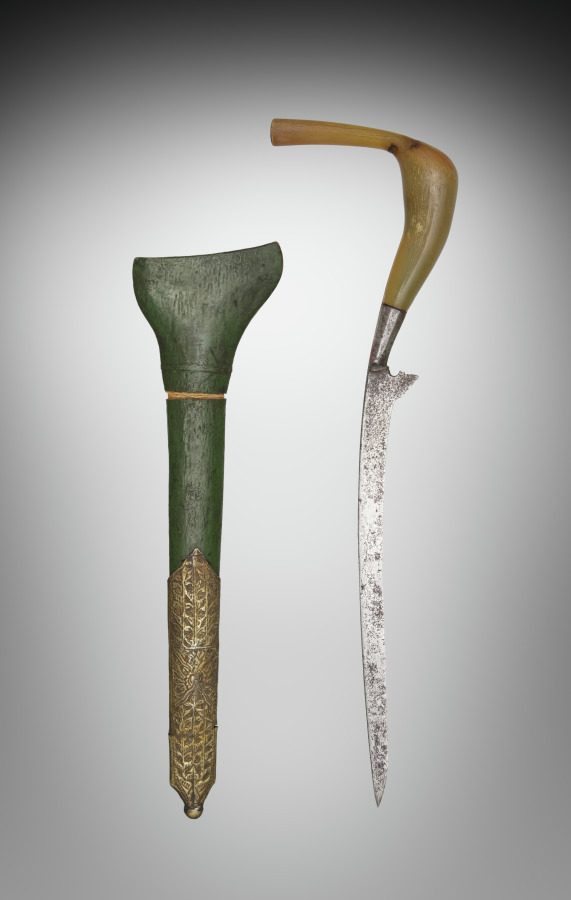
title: Dagger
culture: Java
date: 1800s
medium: iron with horn handle and wood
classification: Arms and Armor